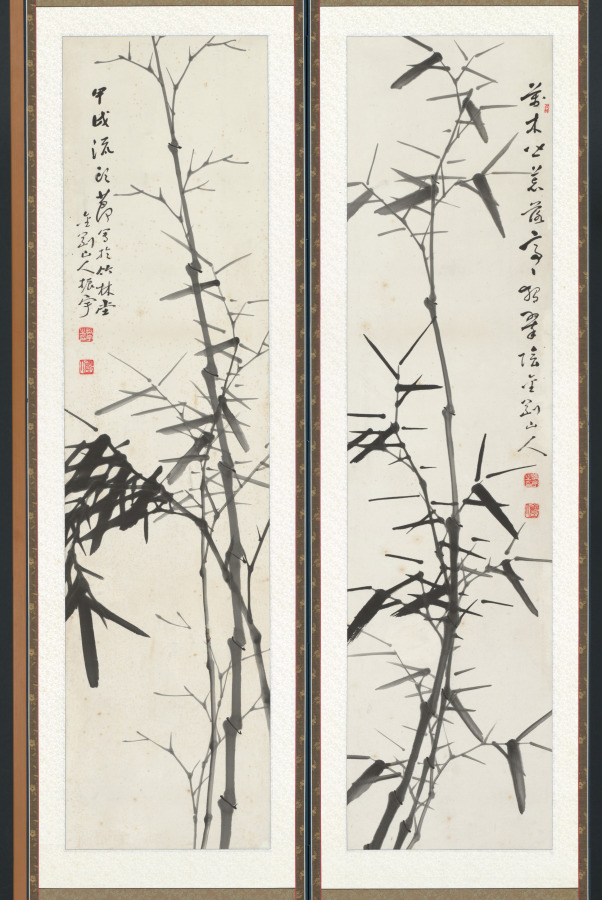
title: Bamboos in Wind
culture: Korea, Japanese colonial period (1910−1945)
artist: Kim Jin-woo (Korean, 1883–1950)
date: 1934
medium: Ten-panel folding screen; ink on paper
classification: Painting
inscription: Two chops stamped on each panel: 振宇之印 (Jinwoo’s Seal); 金剛山人 (Diamond Mountain Man)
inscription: Inscription written on the far-left panel: 甲戌流??寫於竹林堂金剛山人振宇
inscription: Inscription written on the 8th panel: 五百間淸風金剛山人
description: Active during the Japanese colonial period in Korea (1910–45), the artist Jin-woo Kim earned his artistic reputation for his expressive renditions of bamboo swaying in a strong wind. His piercing bamboo shoots are often compared to an iron spear, and their sharp leaves to a knife. It is believed that he deliberately emphasized sharpness in his brushstrokes to express his strong resistance against Japanese colonial oppression.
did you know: The artist’s prolific artistic production were a major part of fundraising efforts to support resistance activities for Korea’s independence.